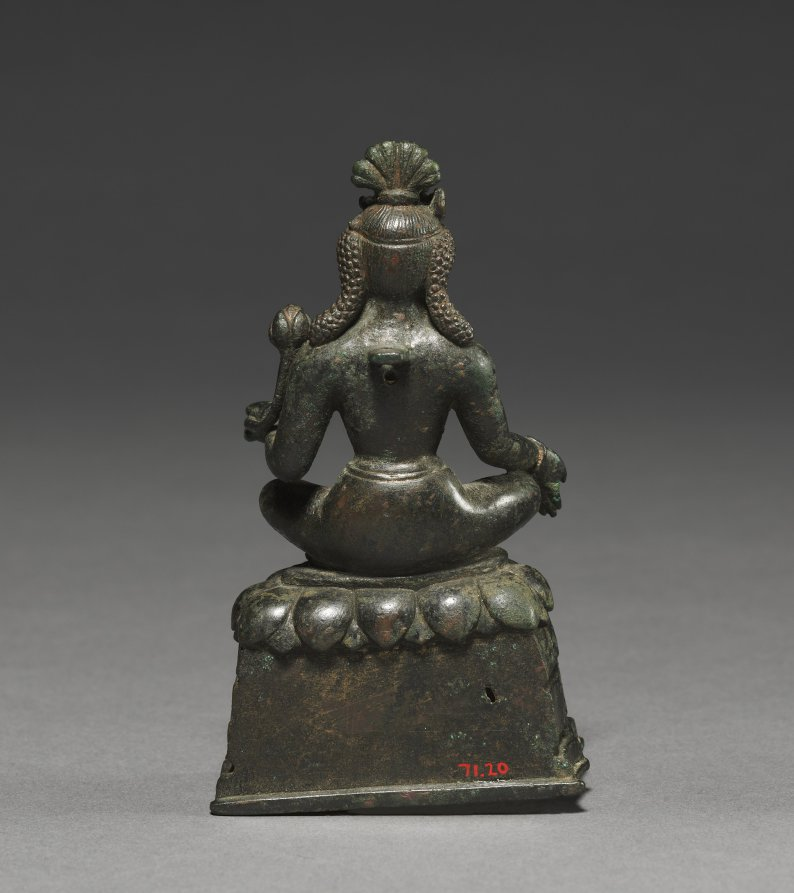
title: Padmapani Lokeshvara Seated on the Rock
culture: India, Kashmir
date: 700s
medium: bronze with silver overlay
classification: Sculpture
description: Though diminutive, this image conveys a monumental power through the intense expression particular to Kashmiri art. He sits alert in yogic concentration on a lotus pedestal that exists miraculously in a rocky wilderness. His left hand holds the stem of a lotus flower—the main attribute of this bodhisattva of compassion. His generously sized right hand with fleshy palm is in the gift-giving gesture. The tiny figure of Amitabha, the Buddha who sits in meditation in his crown, identifies the image as Avalokiteshvara.